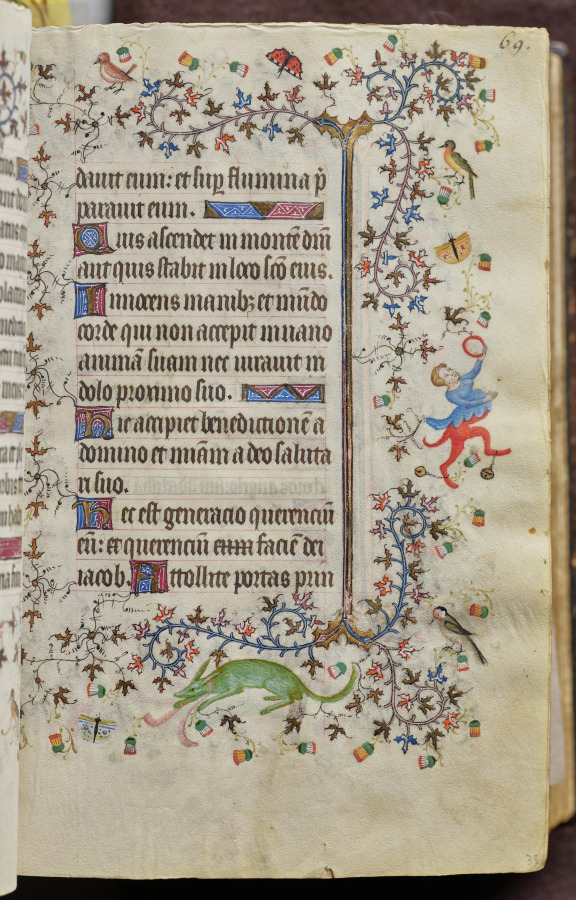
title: Hours of Charles the Noble, King of Navarre (1361-1425): fol. 35r, Text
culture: France, Paris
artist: Master of the Brussels Initials and Associates (French)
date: c. 1405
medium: ink, tempera, and gold on vellum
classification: Bound Volume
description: This precious volume was obviously highly prized by its owner, the French-born King of Navarre, who had his coat of arms painted on no less than twenty folios. Rather than directly commissioning this manuscript from a specific workshop, it seems that Charles the Noble acquired his book of hours -- perhaps ready-made for the luxury market -- while on a trip to Paris in 1404-05. A collaborative effort, six painting styles are evidenced within the pages of this codex, those of two Italians, two Frenchmen, and two Netherlanders. The painter who was responsible for the planning and decoration of the book, and who produced seventeen of the large miniatures, was a Bolognese artist known as the Master of the Brussels Initials. His principal assistant, responsible for most of the borders, was a Florentine who signed his name "Zecho" da Firenze on folio 208 verso.